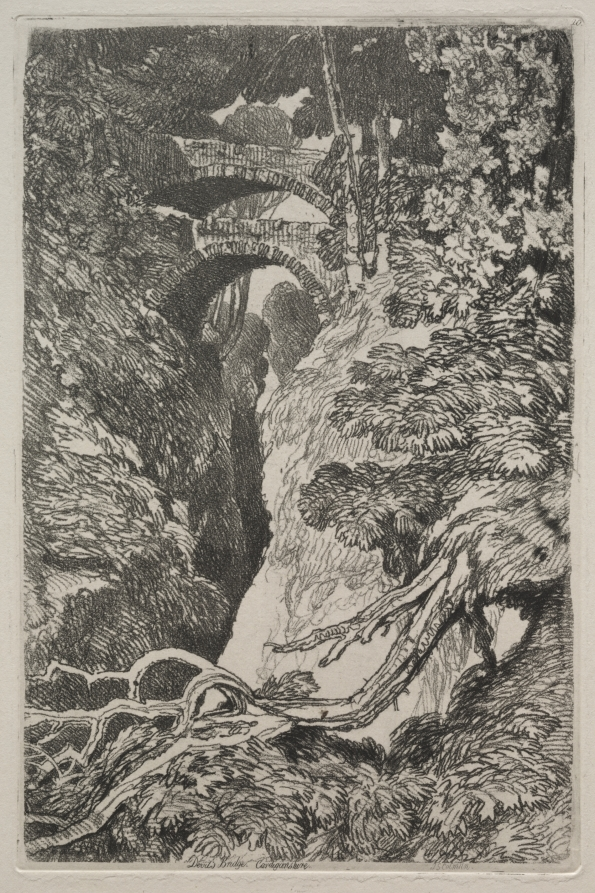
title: Liber Studiorum: Devil's Bridge, Cardiganshire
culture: England, 19th century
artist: John Sell Cotman (British, 1782–1842)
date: 1838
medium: Soft ground etching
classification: Print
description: Cotman followed in the footsteps of Thomas Gainsborough and also worked in soft-ground etching (see Gainsborough’s Wooded Landscape with Cows in this gallery). Thirty-nine of Cotman’s landscape etchings were published as the Liber Studiorum in 1838. This composition was based on sketches the artist made on the site during his journey through Wales in 1800.